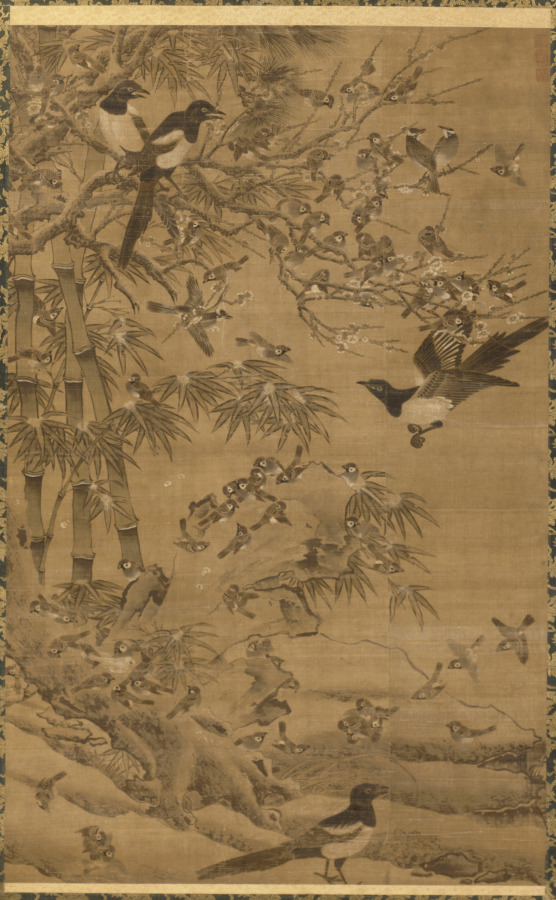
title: A Hundred Birds and the Three Friends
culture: China, Ming dynasty (1368–1644)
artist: Bian Wenjin (Chinese, about 1354–1428)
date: 1400–1425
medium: hanging scroll; ink and color on silk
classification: Painting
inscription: Artist's three seals: Pien yin Ching-chao; Sha-yang shih-chia; Ch'in shu ch'ing-lo.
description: In this hanging scroll birds rest and frolic among pines, bamboo, and flowering plum, plants known as “the three friends.” Due to their endurance in winter, they symbolize perseverance and friendship in adverse times. The naturalistic depiction of the birds refers to the bird-and-flower painting tradition of the Art Academy of the Song dynasty. The painter Bian Wenjin served at the court of the Ming dynasty Yongle Emperor (reigned 1402–24). This painting may have been hung in a private studio or palace hall on appropriate occasions.